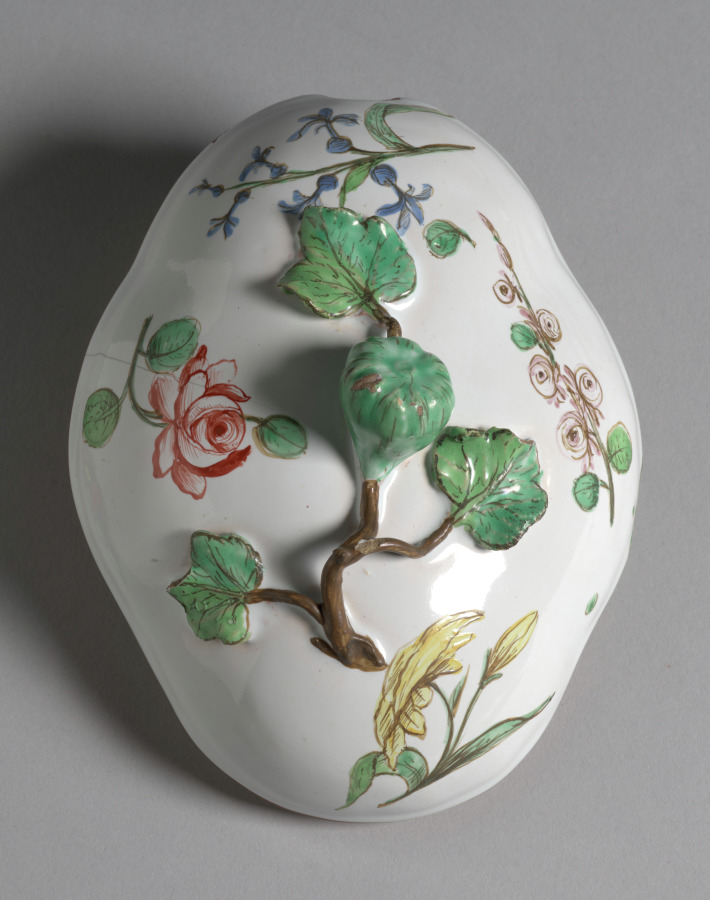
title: Sugar Basin (lid)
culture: France, 18th century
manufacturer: Sceaux Factory (French, active 1748–66)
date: c. 1750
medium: faience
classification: Ceramic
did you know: In medieval Italian churches, painted altarpieces served as a focal point for worshippers during the rituals of faith. The figures of Jesus, Mary, and eight saints are framed by a golden background that would have glistened in the flickering candlelight of the church.